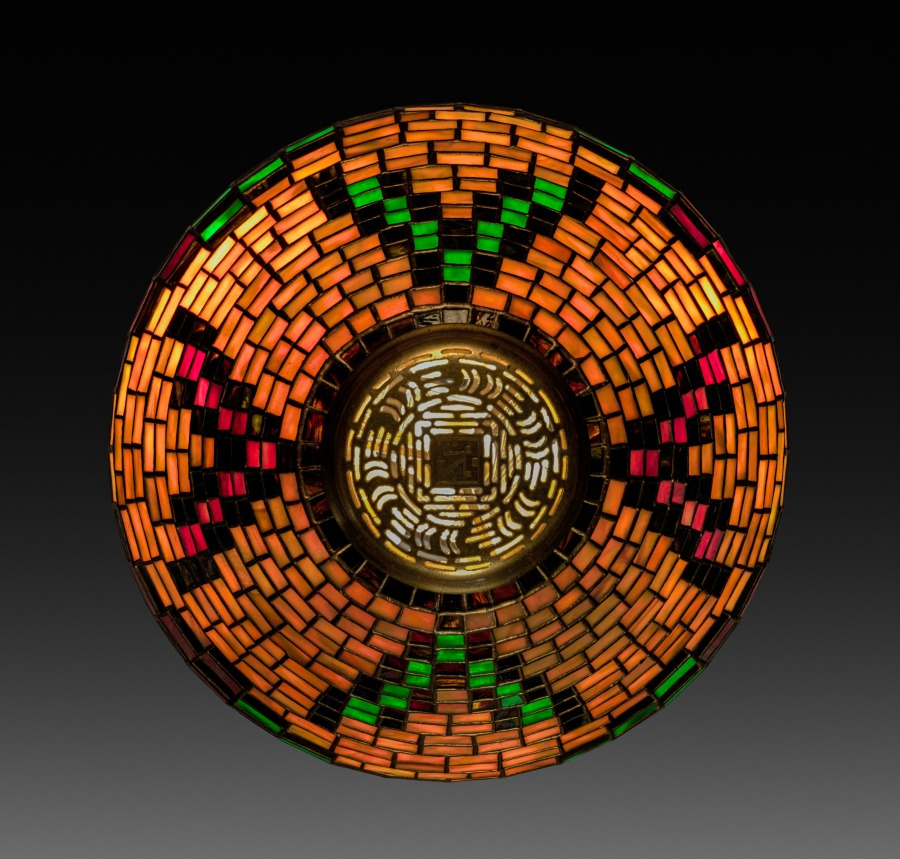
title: Indian Basket Lamp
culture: America, New York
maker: Tiffany Studios (United States, New York, 1902–32)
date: c. 1902–10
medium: Leaded glass, gilt bronze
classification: Lamp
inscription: inside bottom rim of shade: Tiffany Studios New York 1586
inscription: stamped on underside of base: Tiffany Studios/New York/536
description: An admirer of Native American art, Louis Comfort Tiffany amassed a personal collection of textiles, baskets, and pottery, from which he and his designers drew inspiration. He was particularly interested in the way basket weavers formed their patterns using geometric grids, a look he re-created in designs for lamps, such as the Indian Basket lamp.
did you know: This lamp features dichroic glass, which appears green in reflected light but glows amber when illuminated.